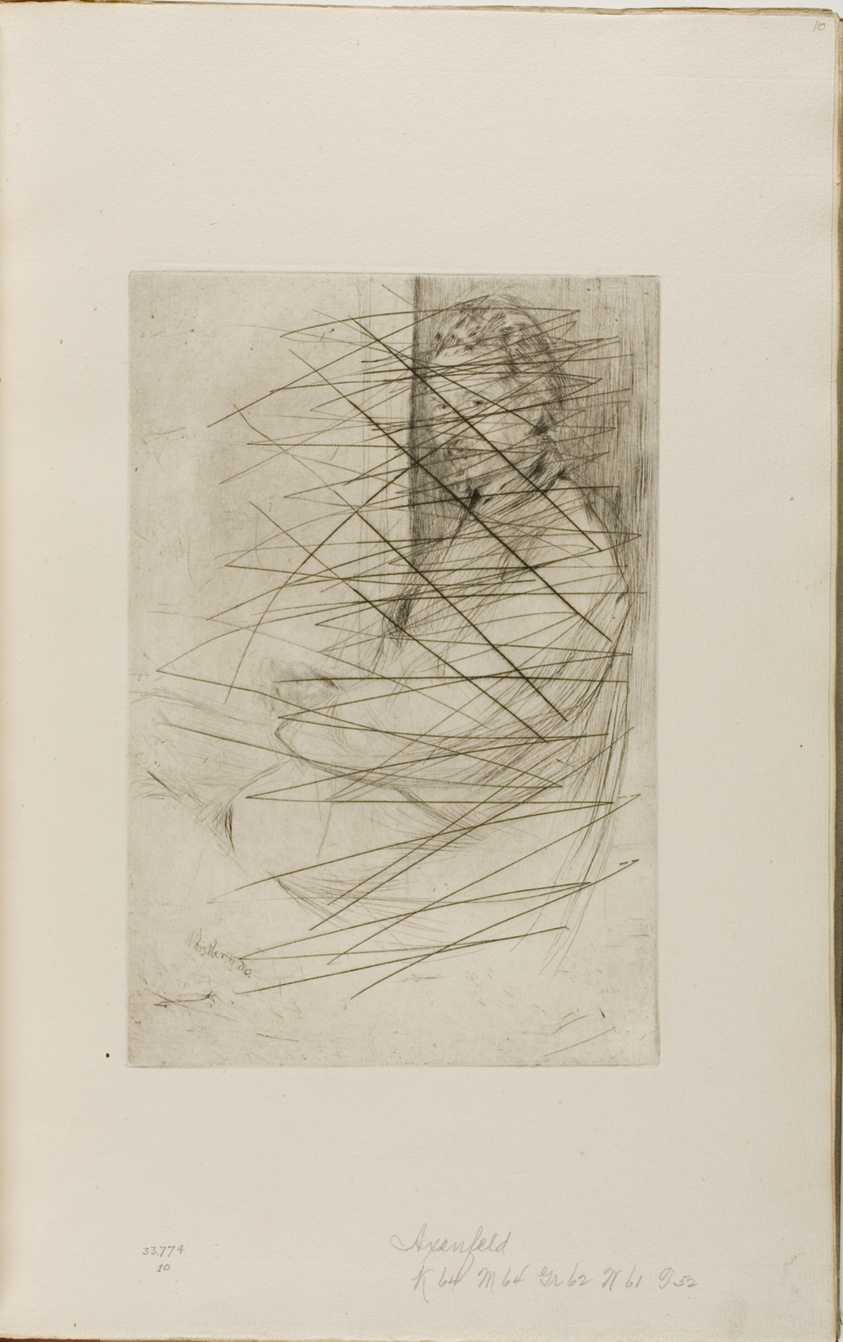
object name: Print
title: Axenfeld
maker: James McNeill Whistler (American, 1834-1903)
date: 1860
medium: Drypoint, with drypoint cancellation, in black ink on ivory laid paper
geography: United States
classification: drypoint; prints and drawing; book; print; paper